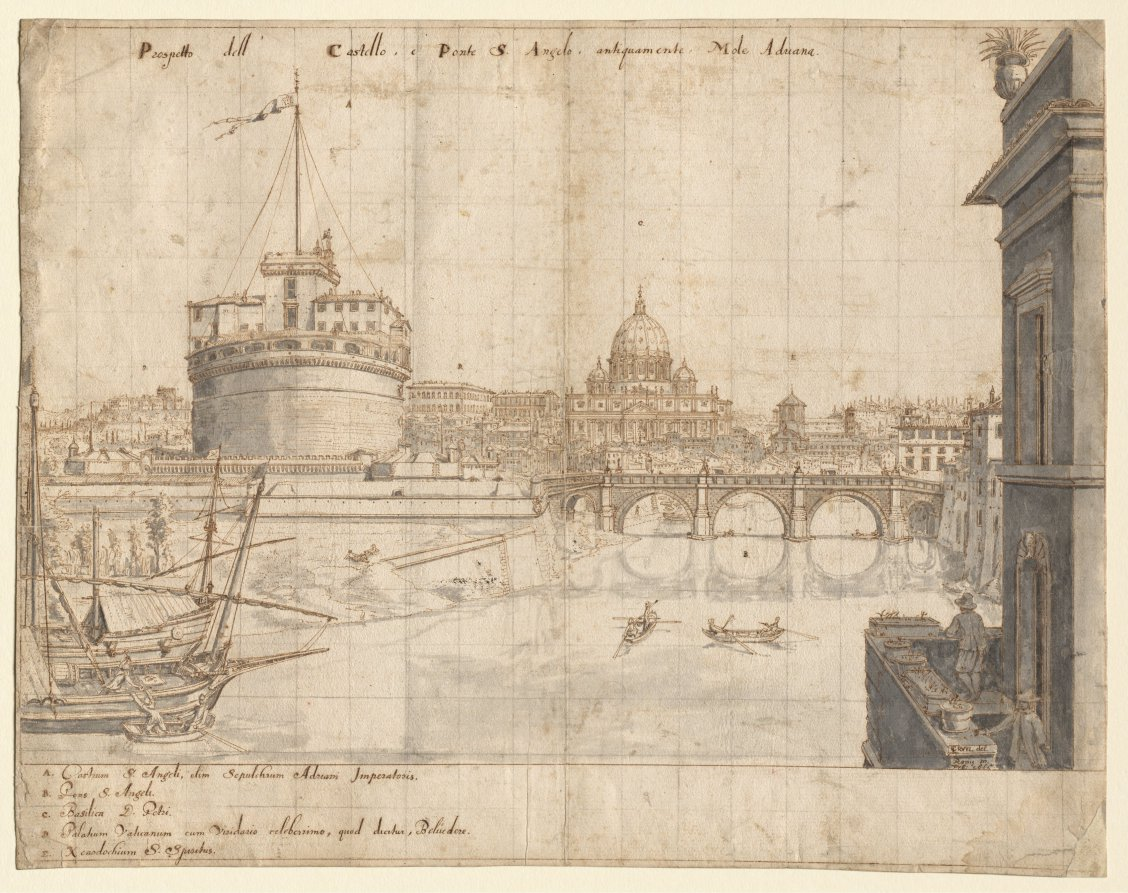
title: Eighteen Views of Rome: The Castel Sant'Angelo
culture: Flanders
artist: Lievin Cruyl (Flemish, c. 1640-c. 1720)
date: 1665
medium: pen and brown ink and brush and gray wash over graphite; squared in graphite; framing lines in brown ink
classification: Drawing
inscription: signed, lower right, in brown ink: [artist's monogram: LC] RVYL del. / Romæ mense / Feb: 1665. ; by artist, upper center, in brown ink: Prospetto dell' Castel, e Ponte S. Angelo, antiquamente, Mole Adriana ; by artist, throughout composition, in brown ink: [the letters A-E] ; by artist, lower left, in brown ink: A. Castrum S. Angeli, olim Sepulchrum Adriani Imperatoris. / B. Pons S. Angeli. / C. Basilica S. Petri. / D. Palatium Vaticanum cum Viridario celeberrimo, quod dicitur, Belvedere. / E. Xenodochum S. Spiritus. ; VERSO, upper left, in brown ink [illegible] [partially masked] ; ON STRIPS OF PAPER MOUNTED TO VERSO, lower center, in graphite: A20985 ; lower right, in graphite: E. 14